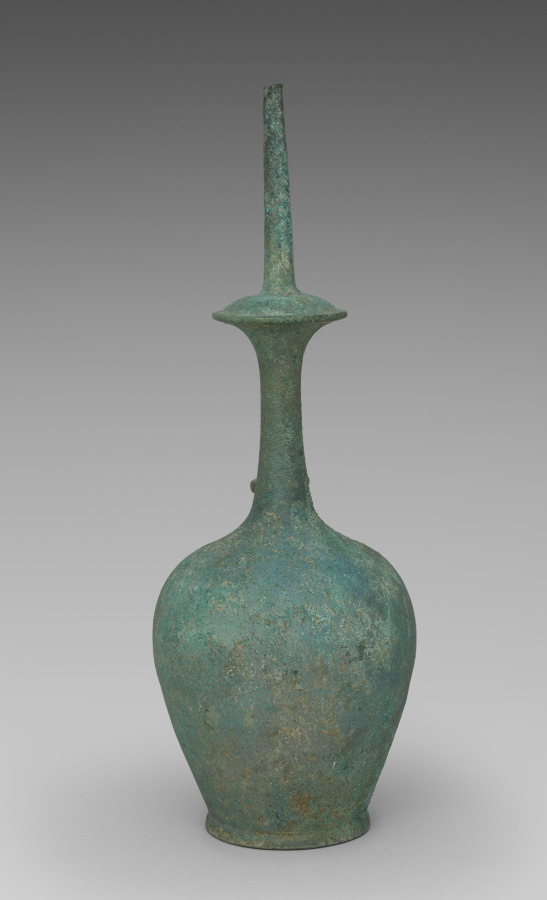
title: Water Ewer for Rituals (Kundika)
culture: Korea, Goryeo dynasty (918–1392)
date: 1100s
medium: bronze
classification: Metalwork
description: Known as kundika in Sanskrit, this distinctively shaped vessel served to purify a sacred space and to invoke a deity. In Korean Buddhist art, it appears primarily as an attribute of the Bodhisattva Avalokitesvara (Gwaneum in Korean). By the 1100s, however, the kundika was used as aristocrats’ fancy water container for everyday use.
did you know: This distinctively shaped vessel is called a kundika in Sanskrit, simply referring to a water bottle.